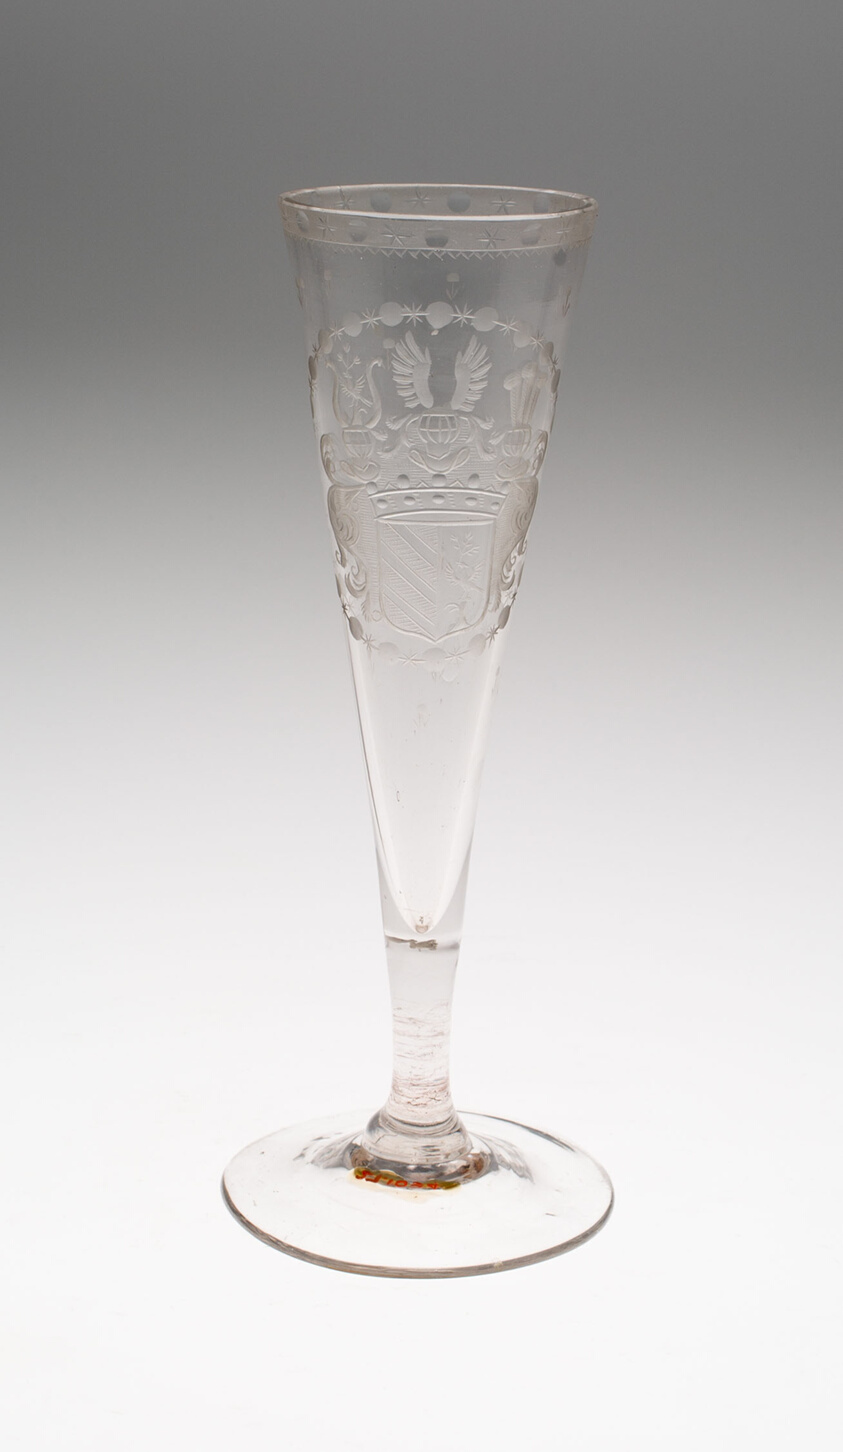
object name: Glass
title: Champagne Glass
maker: Bohemia, Czech Republic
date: c. 1800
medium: Glass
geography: Bohemia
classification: drinking vessel; glass; european decorative arts